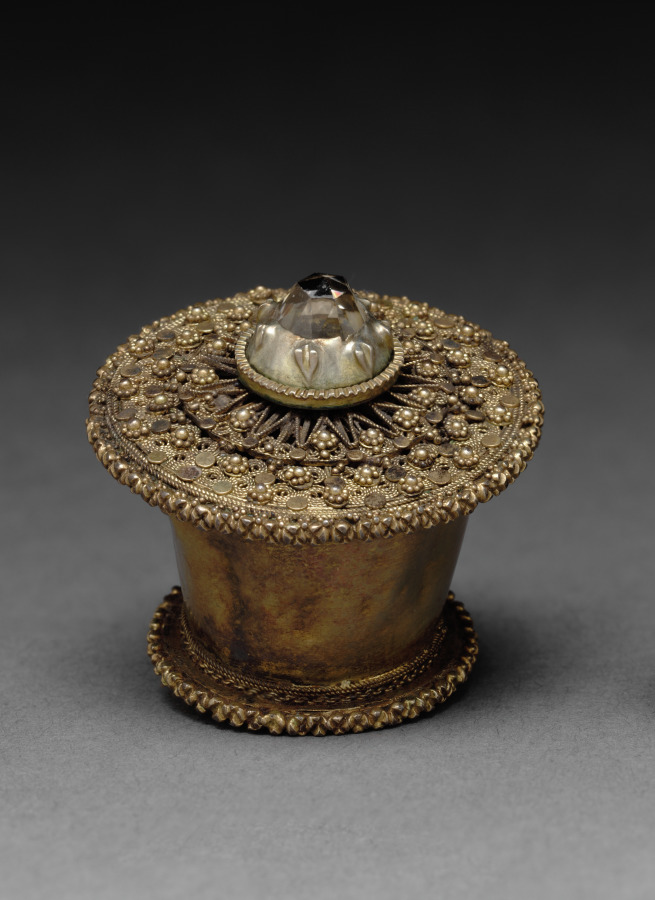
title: Earring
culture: Burma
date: 1800s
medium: silver gilt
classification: Jewelry